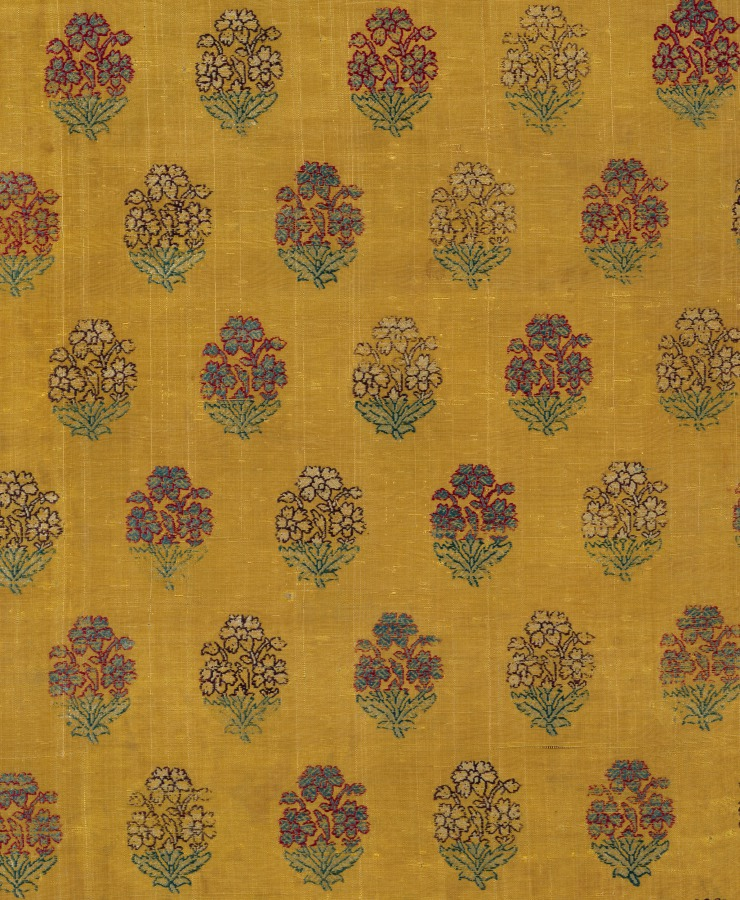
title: Brocade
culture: India, Surat, 19th century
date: 1800s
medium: brocade, "himru"; silk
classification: Textile